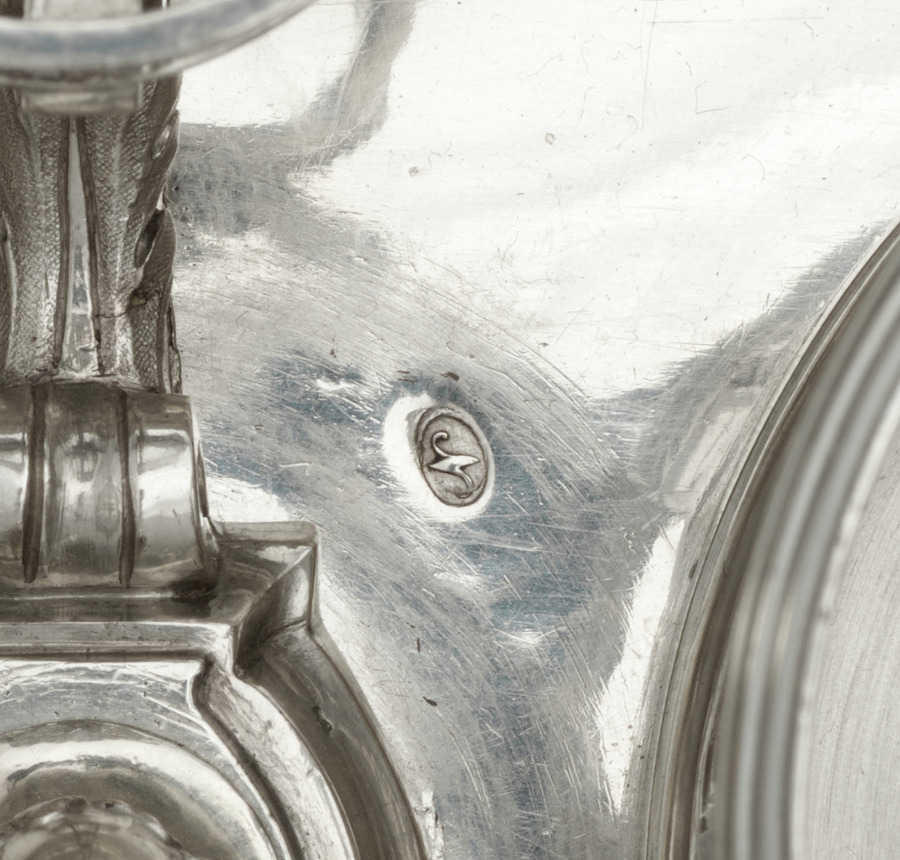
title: Cruet Stand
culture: France, 18th century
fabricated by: Robert Joseph Auguste (French, 1723–after 1795)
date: 1766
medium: silver and glass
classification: Silver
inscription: inscribed on base: R. J. Auguste Paris 1766.